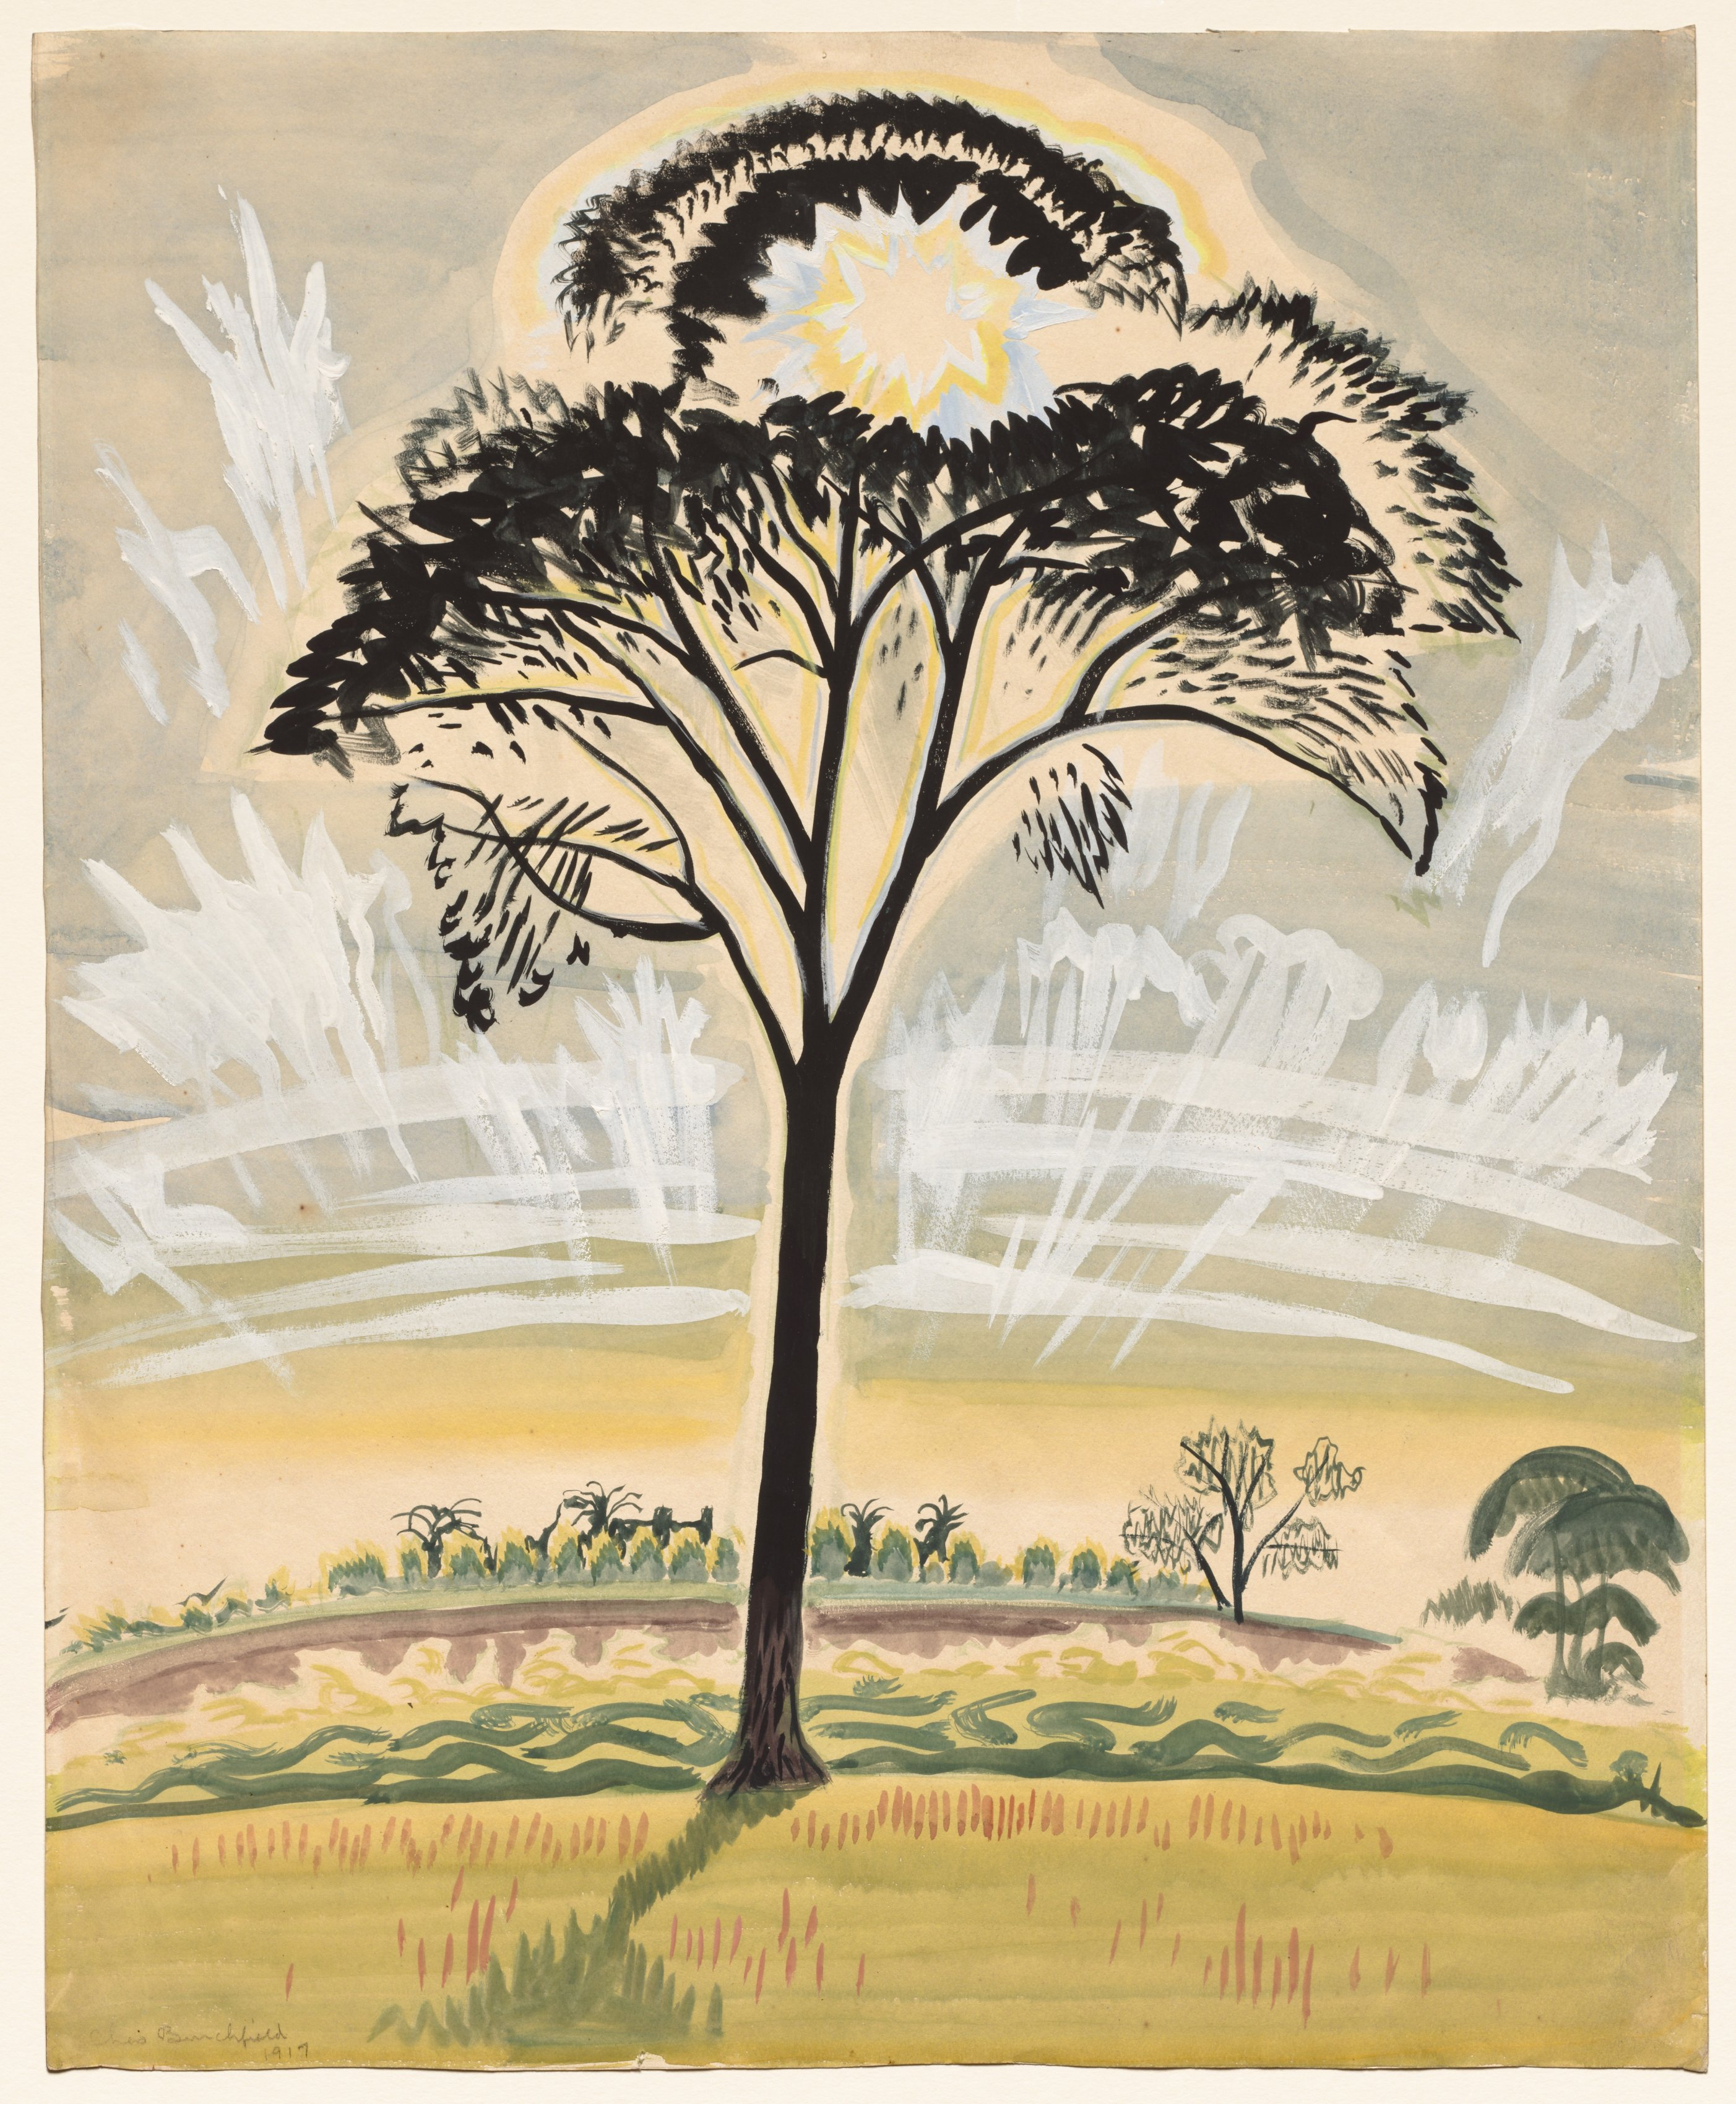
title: The Sun Through the Trees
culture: America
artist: Charles Burchfield (American, 1893–1967)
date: June 30, 1917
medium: Watercolor and opaque watercolor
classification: Drawing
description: While sketching in the Ohio countryside in 1916, Burchfield began to represent the sun as a dramatic orb. This sheet is part of a group in which the artist suggested stained glass windows using trees and the sun. Here, branches reach toward the sun to form a dark, halo-like frame filled by sunlight that diffuses into an array of color. By combining landscape with religious iconography, Burchfield suggested the divine influence he saw in nature.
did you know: This work is an early example in which Burchfield began to paint directly and expressively with watercolor rather than carefully sketching out his composition in advance.